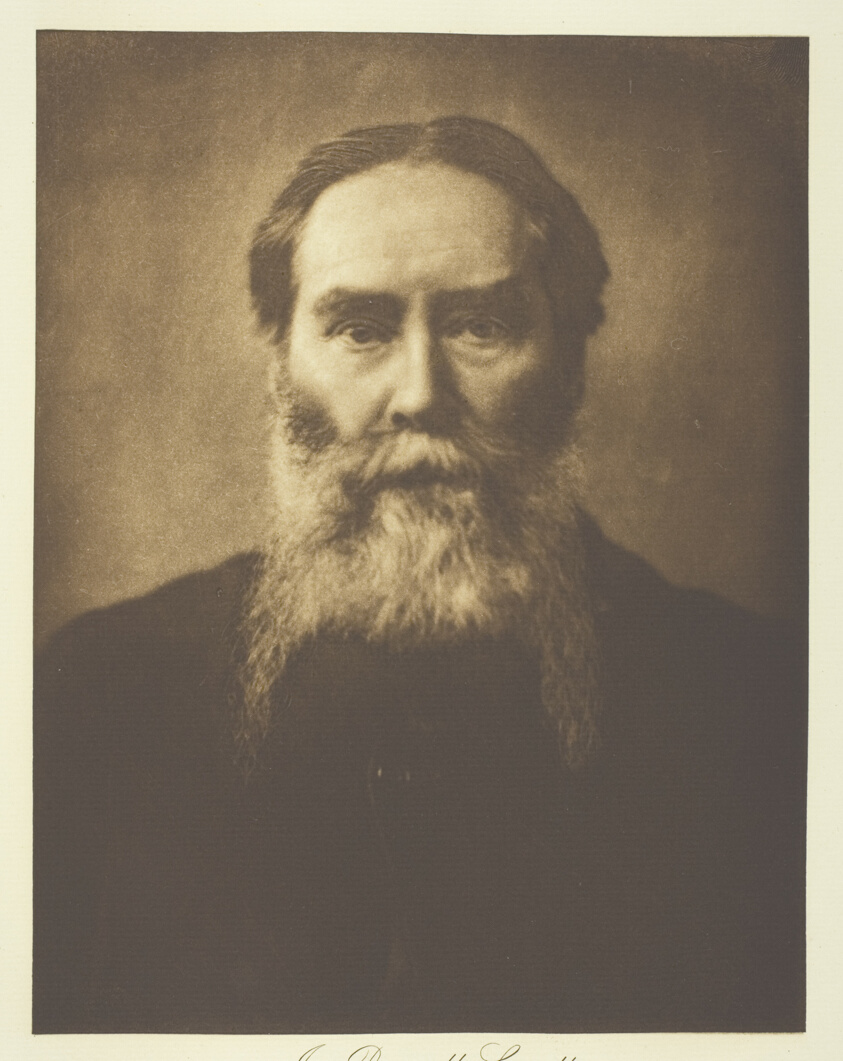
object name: Photograph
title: James Russell Lowell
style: 19th century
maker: Henry Herschel Hay Cameron (English, 1852–1911)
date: c. 1885, printed c. 1893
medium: Photogravure, plate 23 from the album "Lord Tennyson and his Friends" (1893)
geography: England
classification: photogravure; photomechanical process; photography; photograph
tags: Collected by Hugh Edwards, Lord Tennyson and His Friends